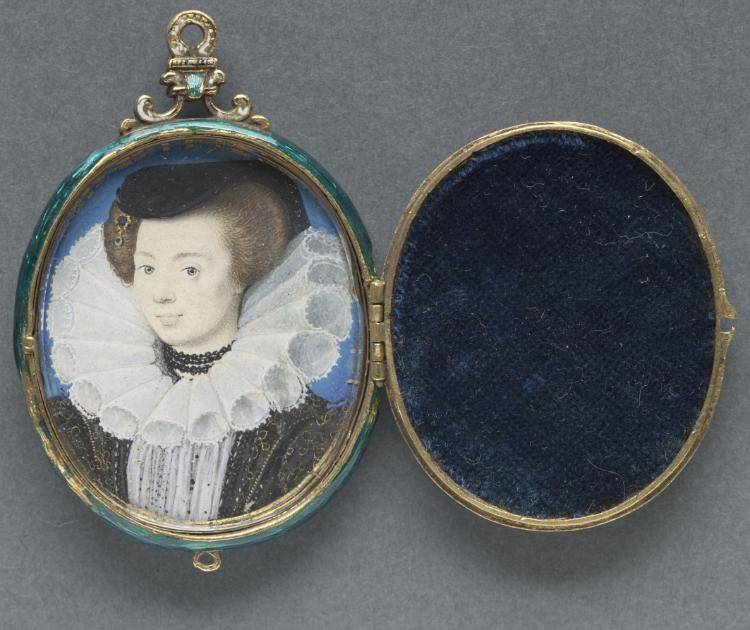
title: Portrait of a Woman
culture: England, 16th century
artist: Nicholas Hilliard (English, c. 1547–1619)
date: c. 1593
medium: watercolor on vellum in a gold and enamel locket frame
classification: Portrait Miniature